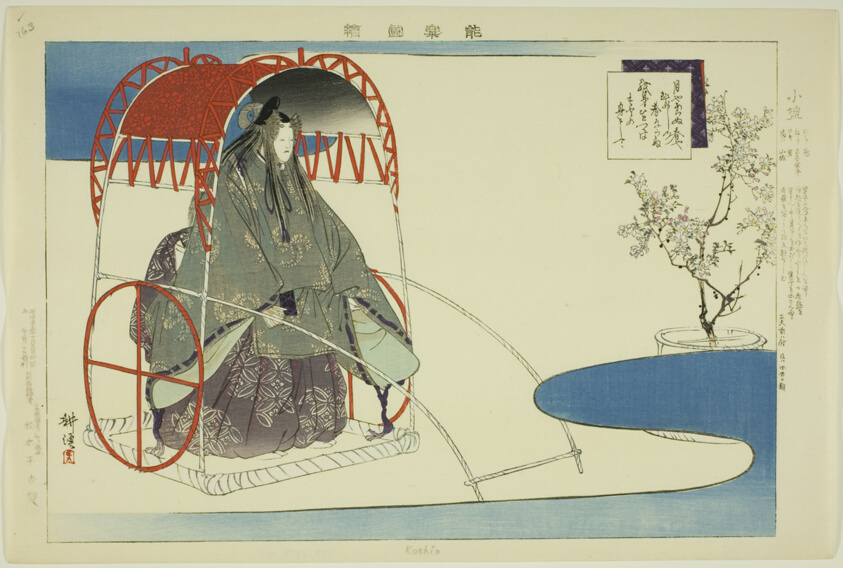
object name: Print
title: Koshio, from the series "Pictures of No Performances (Nogaku Zue)"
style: Japanese (culture or style)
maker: Tsukioka Kogyo; Japanese, 1869-1927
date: 1898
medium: Color woodblock print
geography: Japan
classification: woodblock print; print; asian art